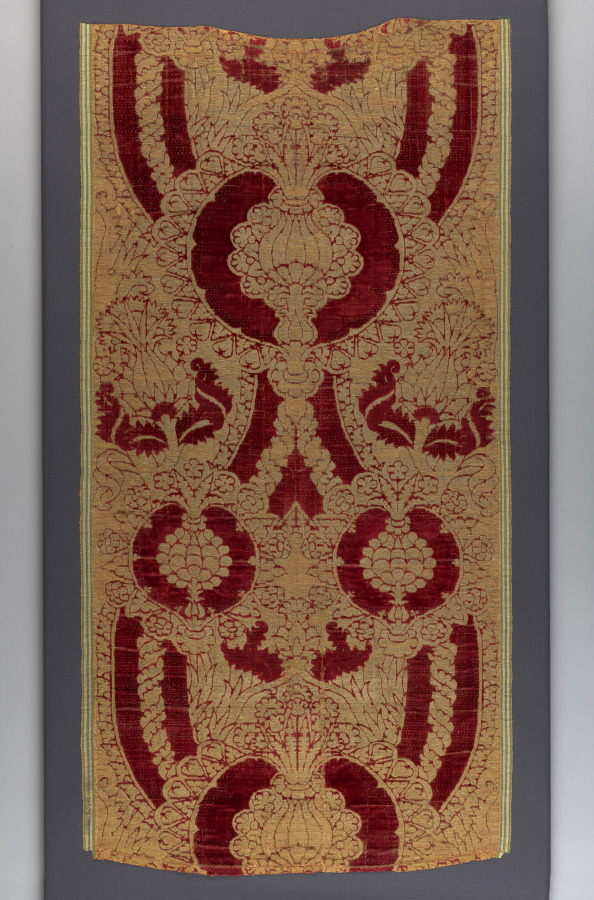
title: Silk Velvet with Gold in Pomegranate Pattern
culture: Italy, possibly Florence, 15th century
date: 1450–1500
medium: silk, gold thread; velvet: cut pile in two heights, uncut pile loops, gold-thread loops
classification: Velvet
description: Luxurious silk velvets with expensive gold thread were symbols of wealth and power. The finest velvets during the 1400s have two, or even three, heights of lush projecting pile. This fashionably large pomegranate pattern features exorbitant gold-thread loops enriching the lower level and a plain higher level. The curved upper and lower contours suggest this was the back of a sleeveless ecclesiastical vestment known as a chasuble. The striped green and ivory selvage was the equivalent of a label, required by law. It identified the fiber content, its quality, and quantity, which determined the price. Selling prices reflected the costs of the raw materials—gold thread, silk, and dyestuffs. Compensation for artisans was generally minimal.